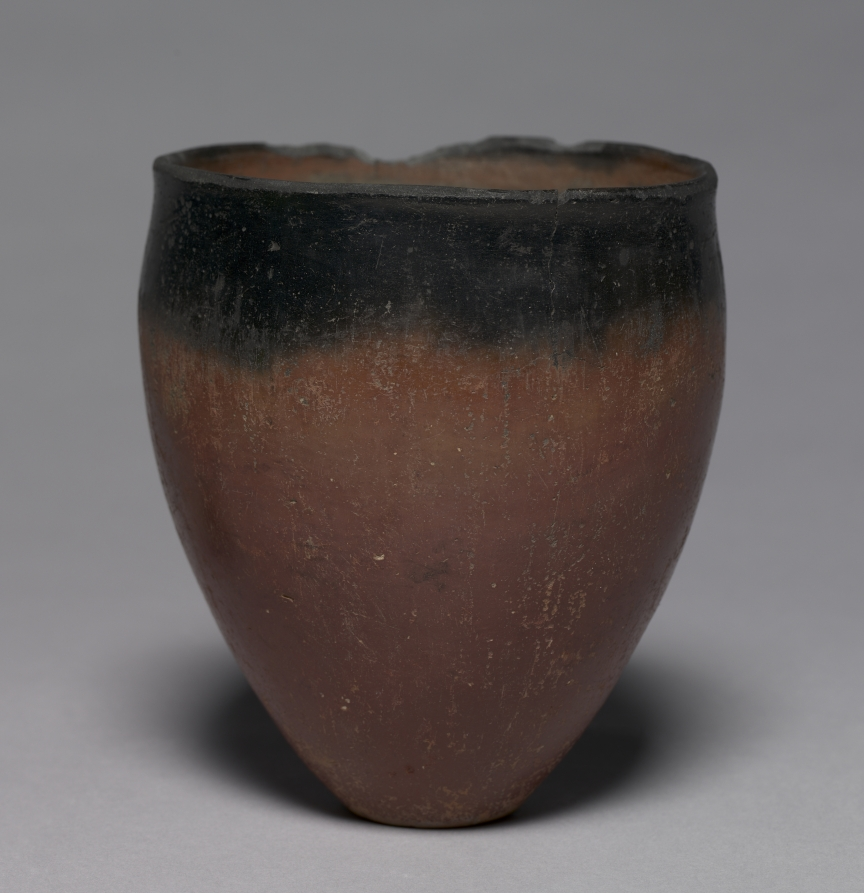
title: Black-Topped Beaker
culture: Egypt, Predynastic (5000–2950 BCE), Naqada I–IIb (3900–3300 BCE)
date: 4500–3000 BCE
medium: Nile silt pottery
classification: Vessels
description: Red polished vessels with black rims (known as black-topped red ware or B-ware) were the most common funerary pottery during the early Predynastic Period. The characteristic blackening of the rim was probably achieved by burying the mouth of the pot in the ashes of the kiln. The iron in the exposed part would then fire red while the covered area turned black.